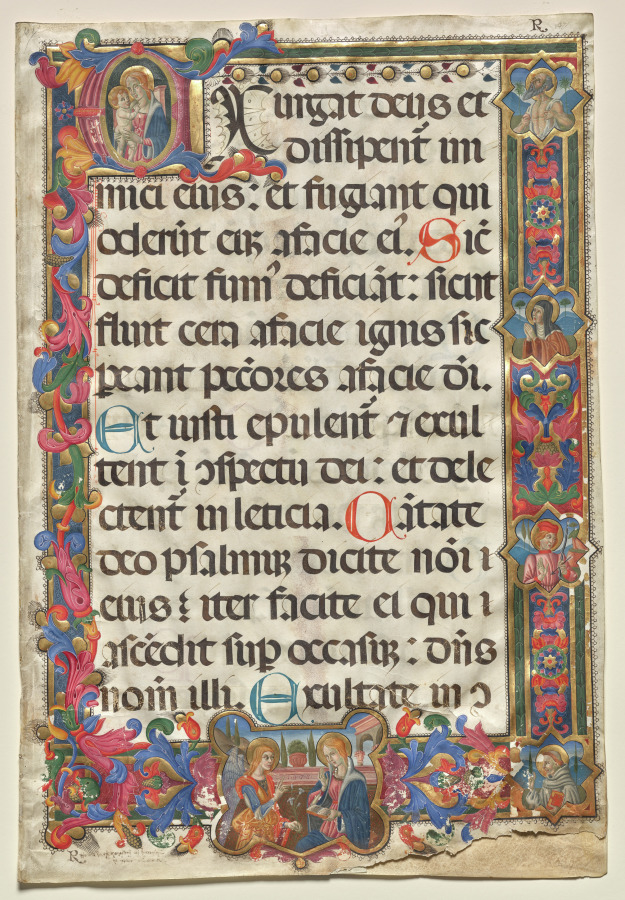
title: Leaf from a Psalter with Full Border with Medallions (Annunciation, SS. Jerome, Clare, Sebastian and Bernardino) and Historiated Initial (E): Virgin and Child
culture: Italy, Umbria or Tuscany, 15th century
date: 1475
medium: ink, tempera, and gold on parchment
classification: Manuscript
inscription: (Front:) Exurgat Deus, et dissipentur inimici ejus Sicut deficit fumus deficiant sicut fluit cera a facie ignis sic pereant peccatores a facie Dei Et iusti epulentur exultent in conspectu Dei delectentur in Laetitia Cantate Deo psalmum dicite nomini eius iter facite ei qui ascendit super occasum Dominus nomen illi et exultate in conspectu (Back:) eius turbabuntur a facie eius Patris orfanorum et iudicis viduarum Deus in loco sancto suo Deus inhabitare facit unius moris in domo qui educit vinctos in fortitudine similiter eos qui exasperant qui habitant in sepulchris Deus cum egredereris in conspectu populi tui cum pertransieris in deserto Terra mota est etenim caeli distillaverunt a facie Dei Sinai a facie Dei Israel Pluviam voluntariam segregabis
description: This leaf contains Psalm 67. The original full manuscript would have held all 150 psalms. Psalters like this were made in a large format for communal prayer. This leaf is richly adorned with an elaborate border with a historiated, or decorated, initial E showing the Madonna and Child. Around the border are Saint Jerome, Saint Clair, Saint Sebastian, and Saint Bernardino, a popular and much-venerated preacher from Siena, Italy. The bottom medallion depicts the Annunciation, or announcement to the Virgin Mary that she would conceive a son by the power of the Holy Spirit. She is shown seated, reading from a book of hours.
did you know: Saint Bernardino, seen in the lower right, was a popular and much-venerated preacher from Siena.